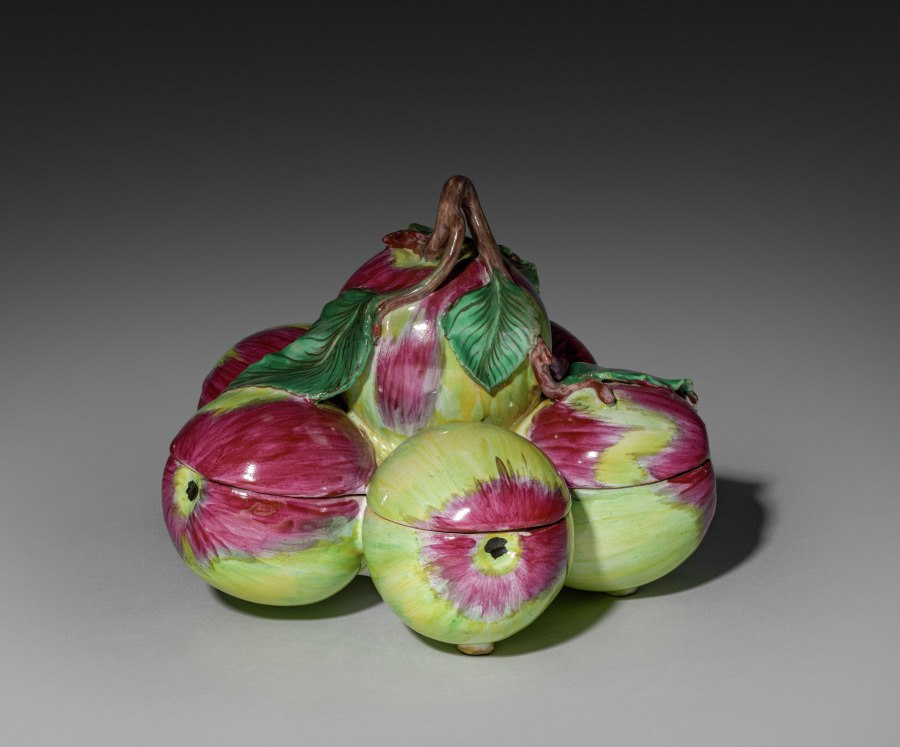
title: Covered Box in the Form of Apples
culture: France, 18th century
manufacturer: Sceaux Factory (French, active 1748–66)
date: c. 1760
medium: Tin- glazed earthenware (faience) wth enamel decoration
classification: Ceramic